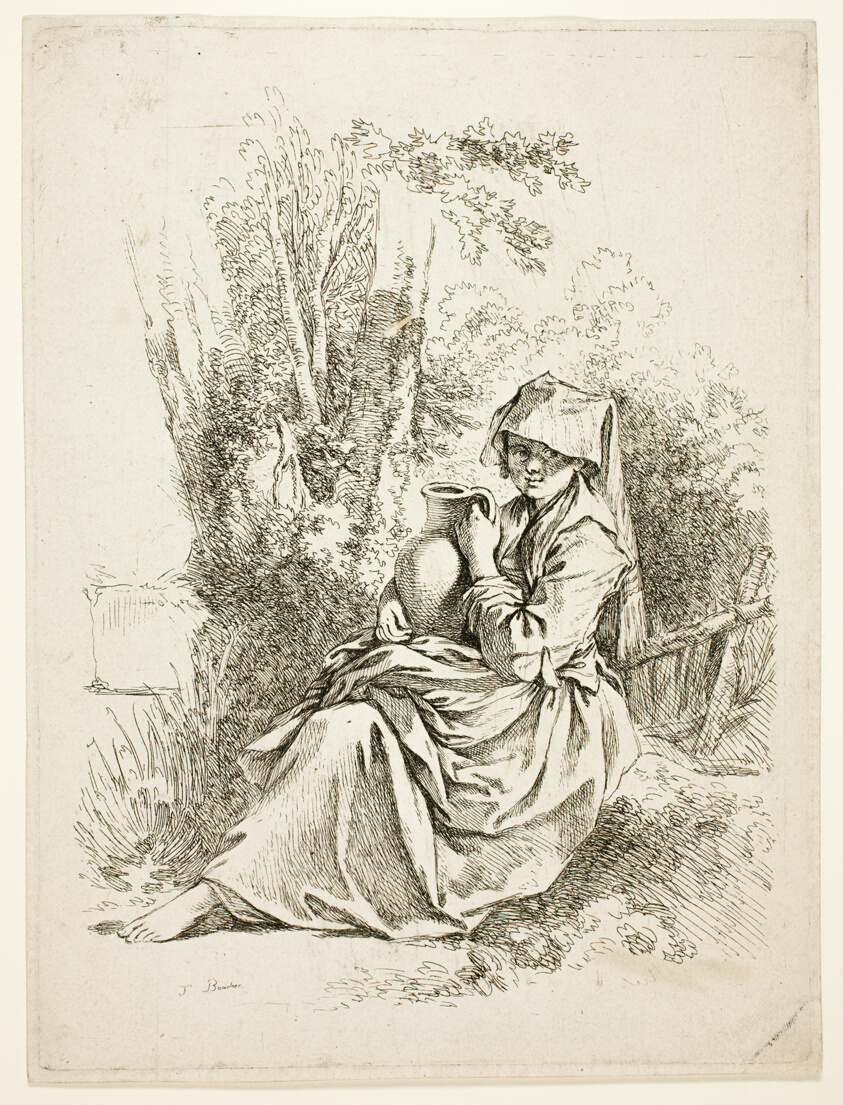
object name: Print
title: Peasant Woman with a Jug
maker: François Boucher (French, 1703-1770)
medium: Etching on paper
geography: France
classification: etching; paper; print; prints and drawing